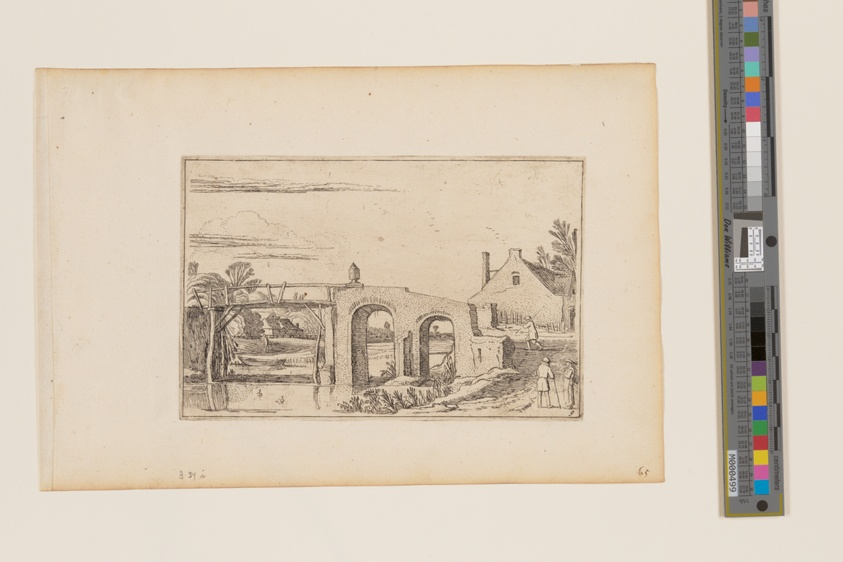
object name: Print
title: Path to Right of a Wooden and Stone Bridge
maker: Esaias van de Velde; Dutch, 1587–1630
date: c. 1610-1630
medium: Etching on ivory laid paper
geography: Netherlands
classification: etching; paper; print; prints and drawing